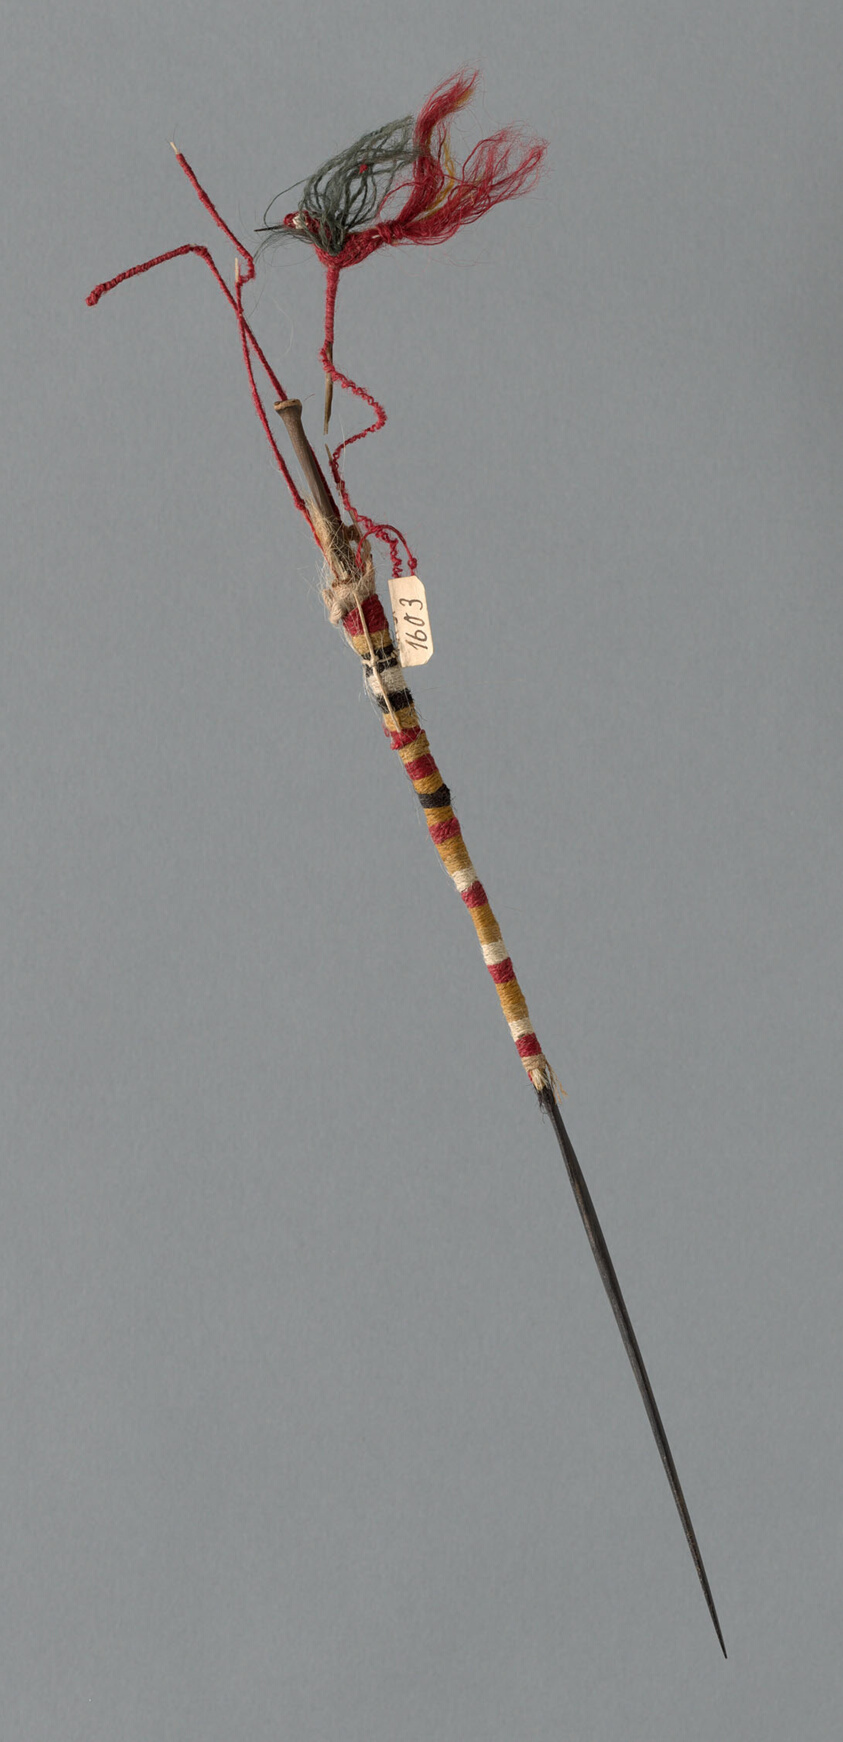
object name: non-art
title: Wooden Spindle with Needlework Decoration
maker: Peru, Possibly central coast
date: 1000/1476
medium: Wood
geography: Peru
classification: spindles (textile working equipment); textile working equipment; accessories (object genre); textile